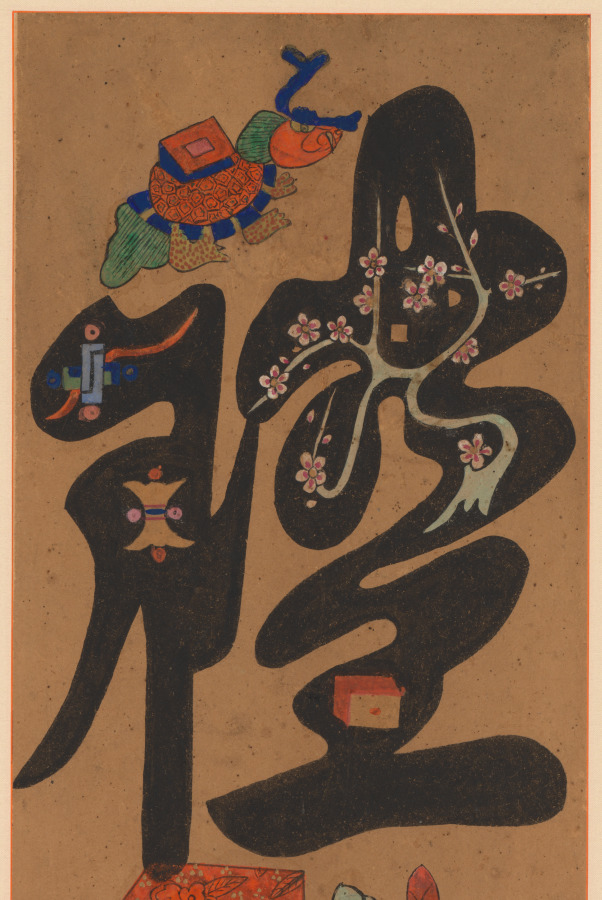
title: Munja-Chaekgeori Screen (Character-Books Screen)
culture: Korea, Joseon dynasty (1392–1910)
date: early 1900s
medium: Eight-panel folding screen, ink on paper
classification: Painting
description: This folding screen is a whimsical harmony of two different subjects: chaekgeori, or books and things; and munja, or characters. The lower section of each panel depicts the imagery of things, including books, decorative arts, and utilitarian objects. The upper portion of each panel bears a classical Chinese character. Read from far right to left, the eight characters refer to the values of Confucian teachings of the Joseon dynasty: filial piety, brotherly love, loyalty, trust, propriety, righteousness, modesty, and humility. While these two pictorial genres are harmoniously conjoined on the same picture plane, two sharply contrasting world views—urban consumerism and traditional Confucian ethics that despise materialism—compete with one another.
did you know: The eight Korean characters each mean filial piety, brotherly love, loyalty, trust, propriety, righteousness or justice, modesty or integrity, and humility or the feeling of shame.